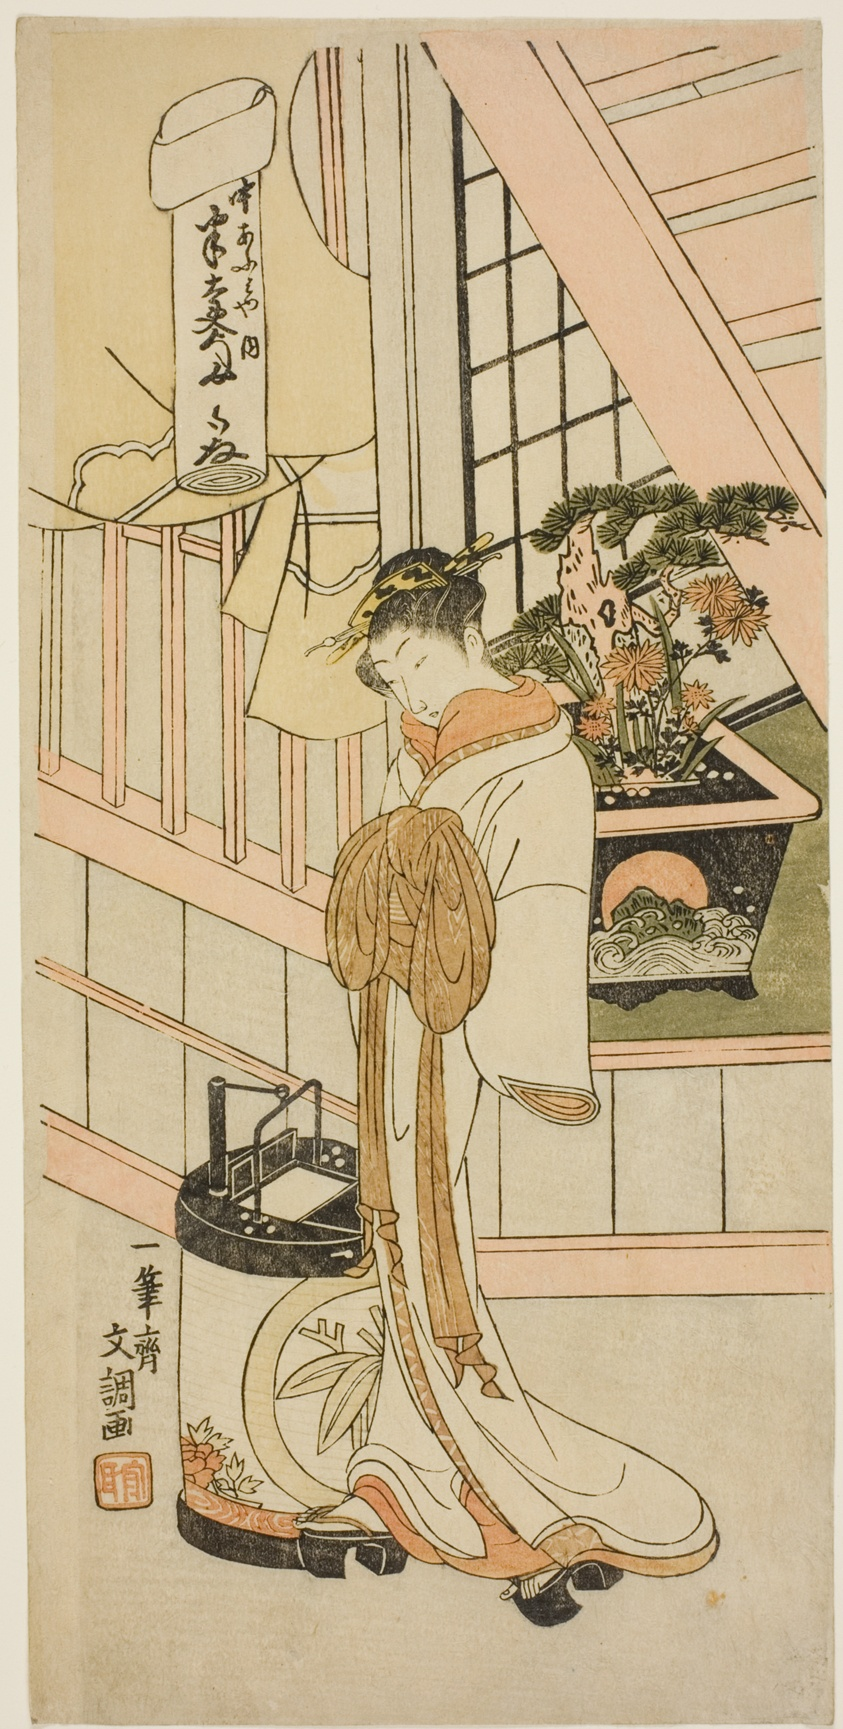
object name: Print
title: The Courtesan Handayu of the Nakaomiya House of Pleasure, from the series "Fuji-bumi (Folded Love-letters)"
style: Japanese (culture or style)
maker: Ippitsusai Buncho (Japanese, active c. 1755-90)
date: c. 1769/70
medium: Color woodblock print; hosoban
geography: Japan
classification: woodblock print; print; asian art